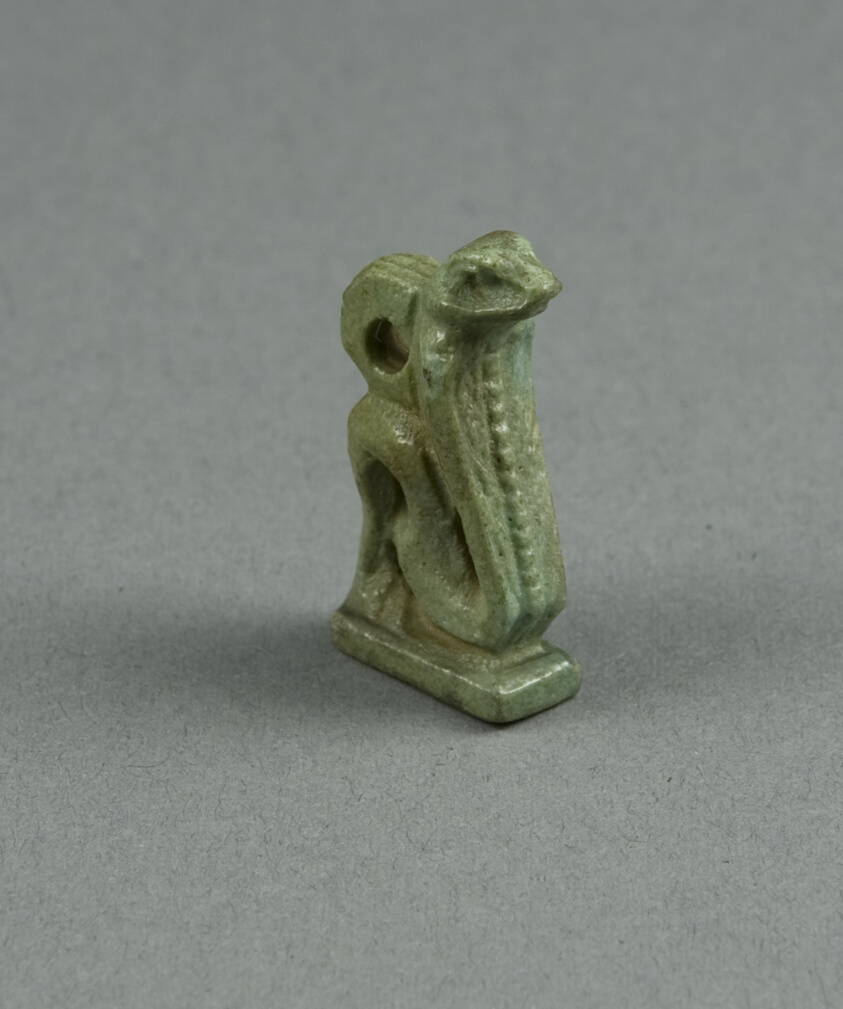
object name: Costume and Accessories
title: Amulet of a Cobra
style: third intermediate period, egyptian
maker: Egyptian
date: Third Intermediate Period, Dynasty 21–25 (1070–656 BCE)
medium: Faience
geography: Egypt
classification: amulet; jewelry; ceramics; ancient art; costume; faïence (composite material)